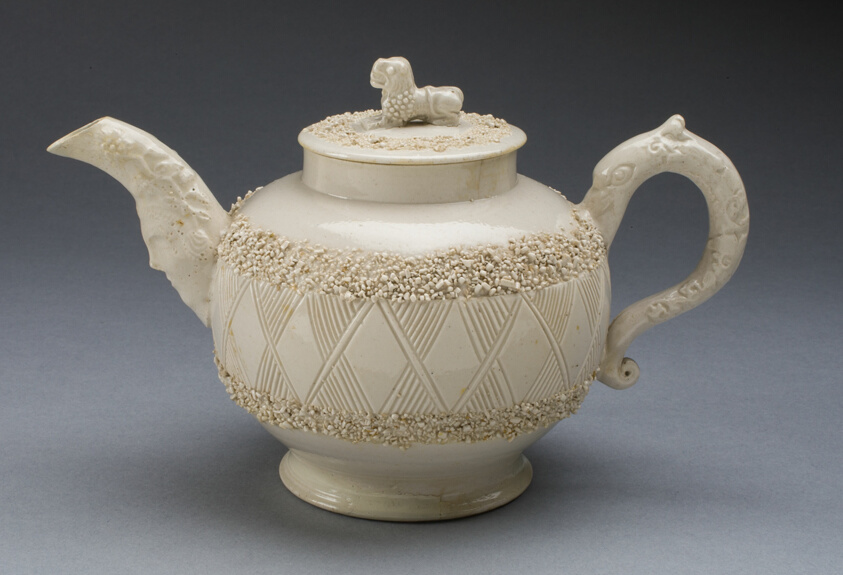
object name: Ceramics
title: Teapot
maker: Staffordshire, England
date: c. 1740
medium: Salt-glazed stoneware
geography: Staffordshire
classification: teapot; ceramics; european decorative arts; stoneware; salt-glazed stoneware